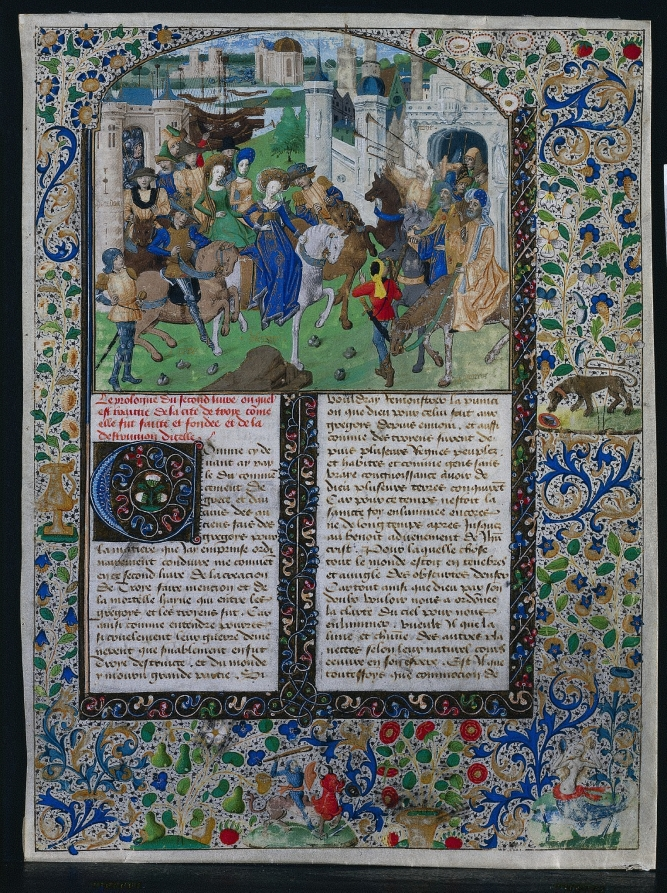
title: Leaf from Jehan de Courcy's "Chronique Universelle": King Priam Meets Helen and Paris outside the Gates of Troy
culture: Northeastern France, 15th century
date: c. 1470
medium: ink, tempera, and gold on vellum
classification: Manuscript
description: This miniature depicts the event that started the Trojan War. Helen, a Greek princess famous for her beauty, was loved by the Trojan prince Paris, who carried her off to Troy. Here she is presented to Priam, the King of Troy and father of Paris, outside the city gates. The leaf comes from Jehan de Courcy’s History of Greece and Rome, which relates the events of human history from the Creation to the birth of Christ. This work is also known as the Chronique Universelle (History of the World) de la Bouquechardière, a name that derives from the lands owned by Jehan de Courcy. Secular histories in the late Middle Ages were in great demand among aristocratic patrons.